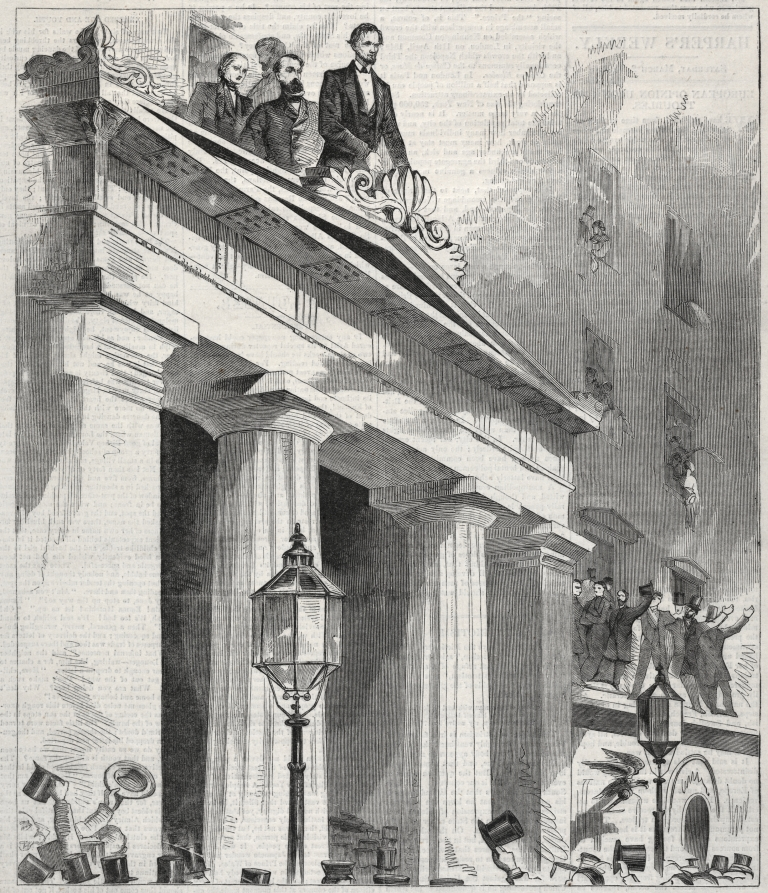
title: Abraham Lincoln, The President Elect, addressing the People from the Astor House Balcony, February 9, 1861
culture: America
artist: Winslow Homer (American, 1836–1910)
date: 1861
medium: wood engraving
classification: Print